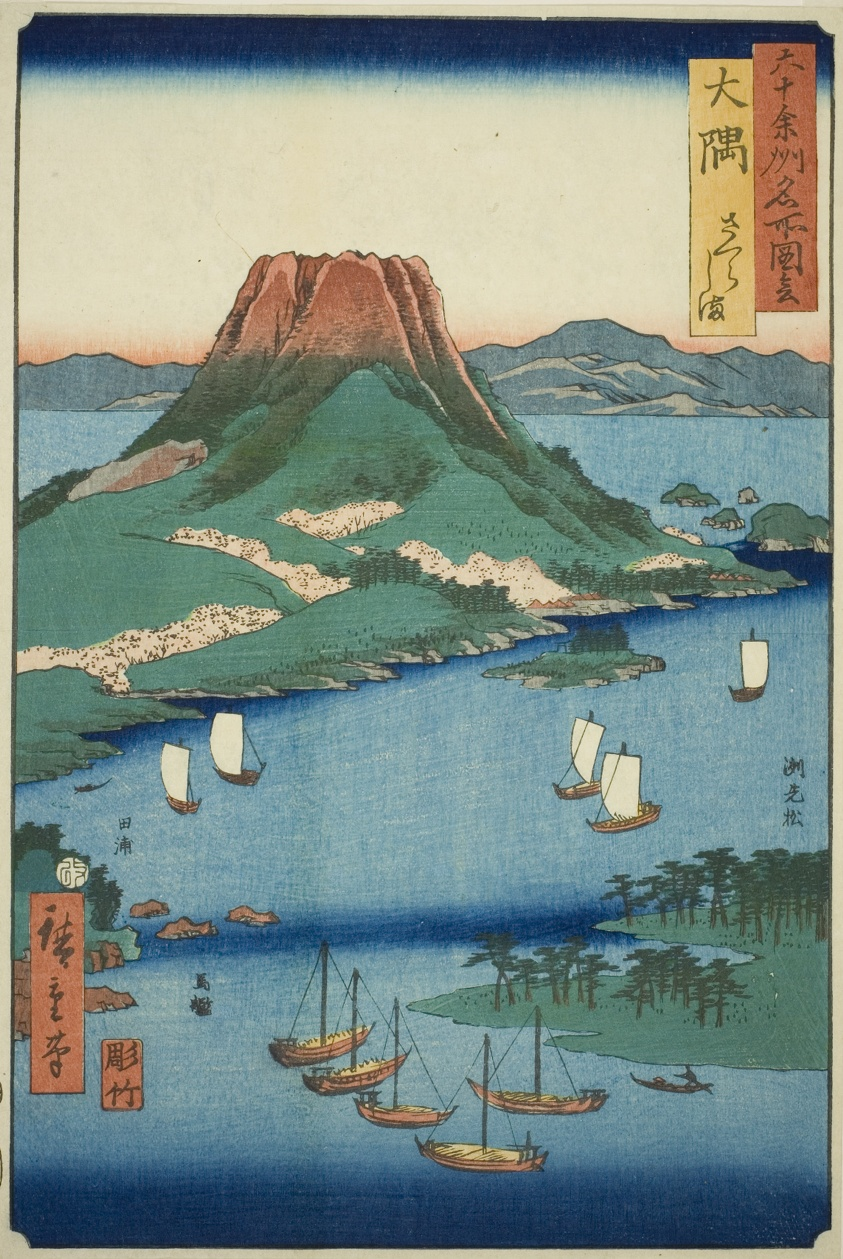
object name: Print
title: Osumi Province: Sakura Island (Osumi, Sakurajima), from the series "Famous Places in the Sixty-odd Provinces (Rokujuyoshu meisho zue)"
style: Japanese (culture or style)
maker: Utagawa Hiroshige 歌川 広重; Japanese, 1797-1858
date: 1856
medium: Color woodblock print; oban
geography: Japan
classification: woodblock print; print; asian art